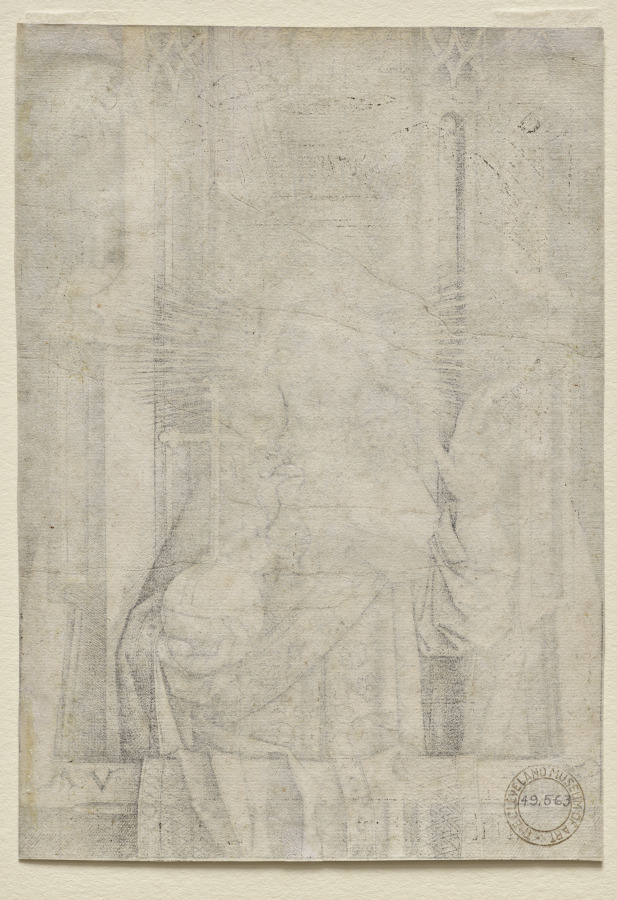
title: Christ the Redeemer (Salvator Mundi)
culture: Germany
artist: Israhel van Meckenem (German, c. 1440–1503)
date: c. 1490–1500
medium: engraving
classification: Print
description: Trained as a goldsmith, Meckenem displayed the decorative potential of his art by engraving a glimmering burst of sword-like rays around Christ’s head and a variety of patterns on Christ’s robe, his jeweled sash, and the tapestries draping the gothic pulpit. The presentation of Christ within ecclesiastic architecture symbolically connects Christ’s authority as Salvator Mundi—Savior of the World—with the Church.